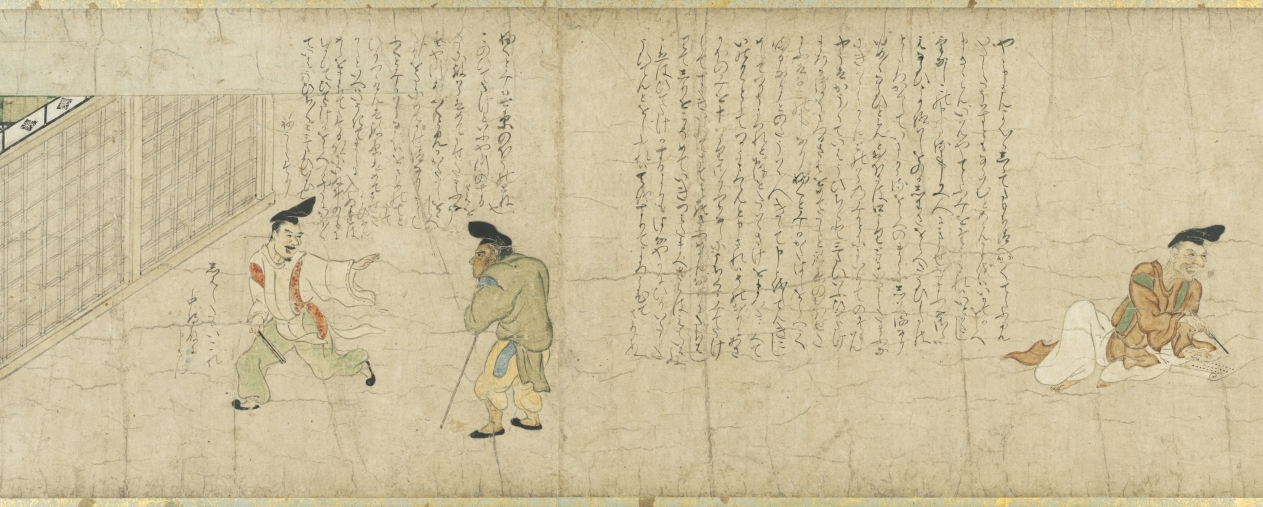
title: The Story of Fukutomi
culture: Japan, Muromachi period (1392–1573)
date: mid-1400s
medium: Handscroll; ink and color on paper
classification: Painting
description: This handscroll shows the second half of an odd tale in which a ne’er-do-well seeks the path to quick fortune and learns the art of musical flatulence. Prior to a major performance, a mentor (and competitor) advises him to consume morning glory seeds, a laxative. Thus, while performing he fouls himself and ends his days in humiliation. The audacious nature of this story and its presentation—well-animated figures with dialogue adjacent to the appropriate moments of action—create a primitive graphic novel. Japanese visual humor about farting preceded this story, but the satirical, mean-spirited twist in this tale suggests its intent was not merely to be humorous. The story was likely commissioned by court officials who disapproved of common performers rising to high positions, outflanking what was the accepted social order.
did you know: This scroll is treasured as the second oldest surviving version of this story.